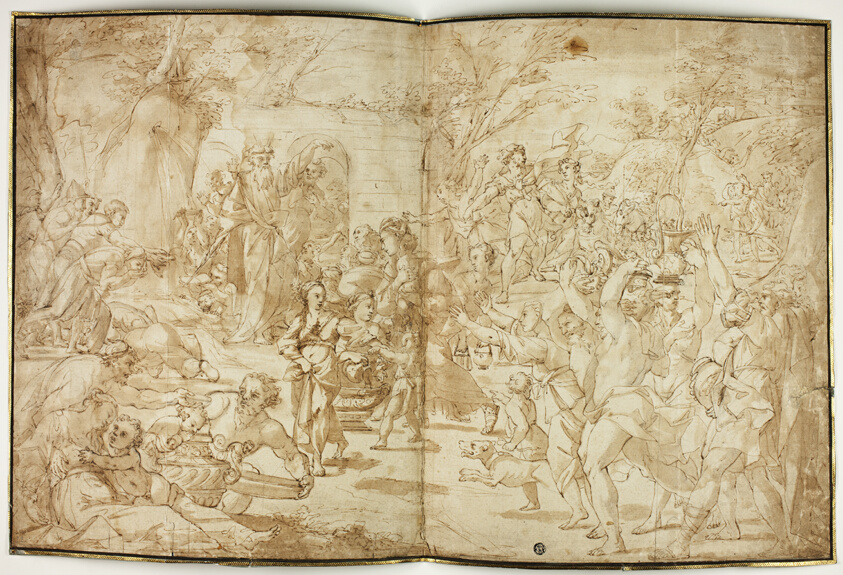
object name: Drawing and Watercolor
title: Moses Drawing Water from the Rock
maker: Style of Raymond de Lafage (French, 1656-1690)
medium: Pen and brown ink and brush and brown wash, with traces of graphite and black chalk, on cream laid paper, laid down on blue laid paper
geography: France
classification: pen and ink drawings; paper; brush and wash; drawings (visual works); prints and drawing